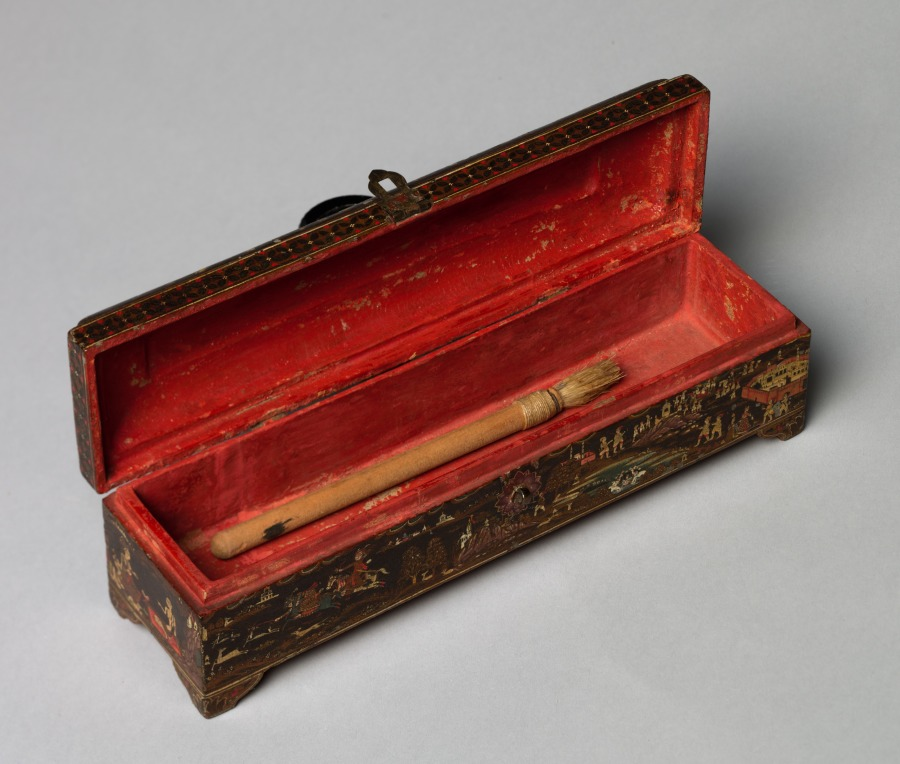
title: Rajput Box with Various Scenes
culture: India, Rajasthan, early 19th Century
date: c. 1800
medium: painted wood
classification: Painting